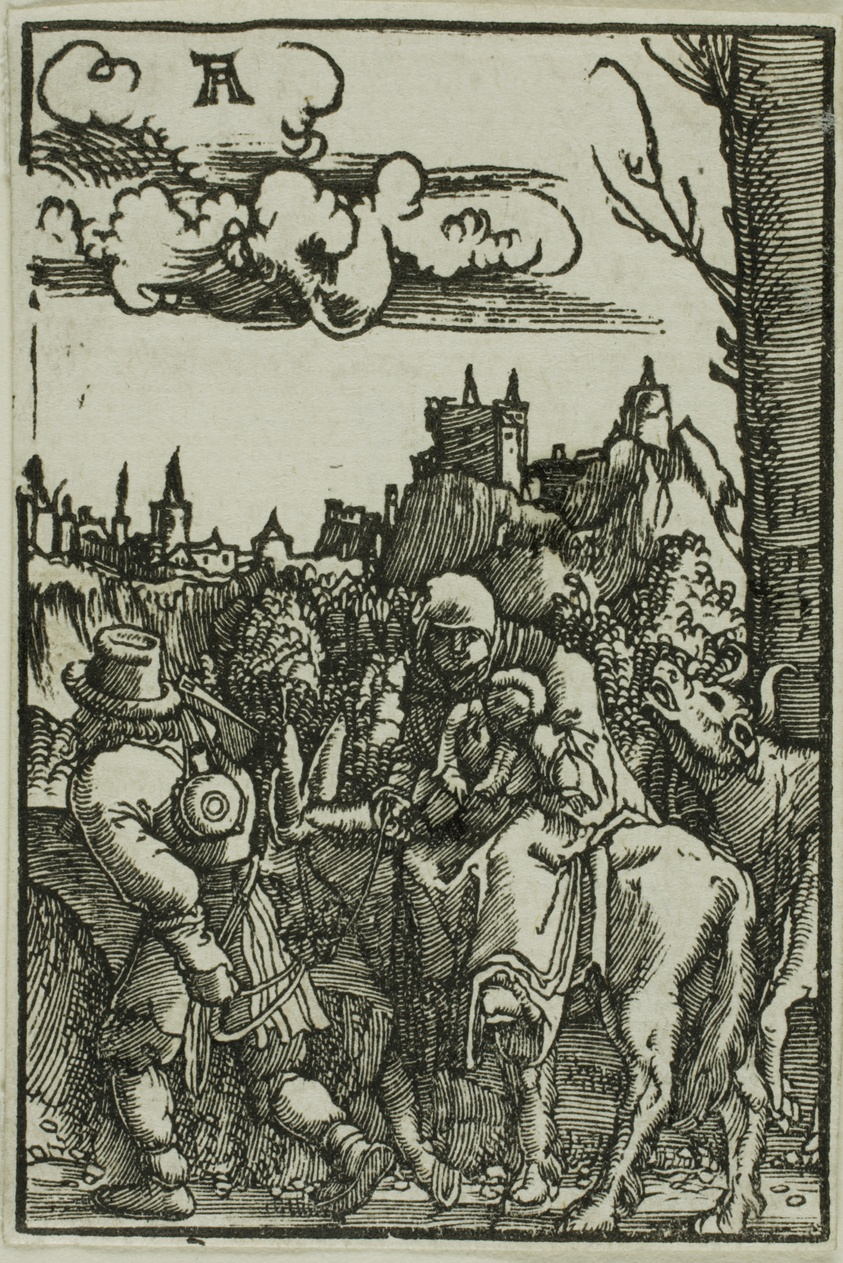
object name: Print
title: The Flight into Egypt, from The Fall and Redemption of Man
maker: Albrecht Altdorfer (German, c.1480-1538)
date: 1513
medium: Woodcut in black on ivory laid paper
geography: Germany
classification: wood engraving; print; prints and drawing